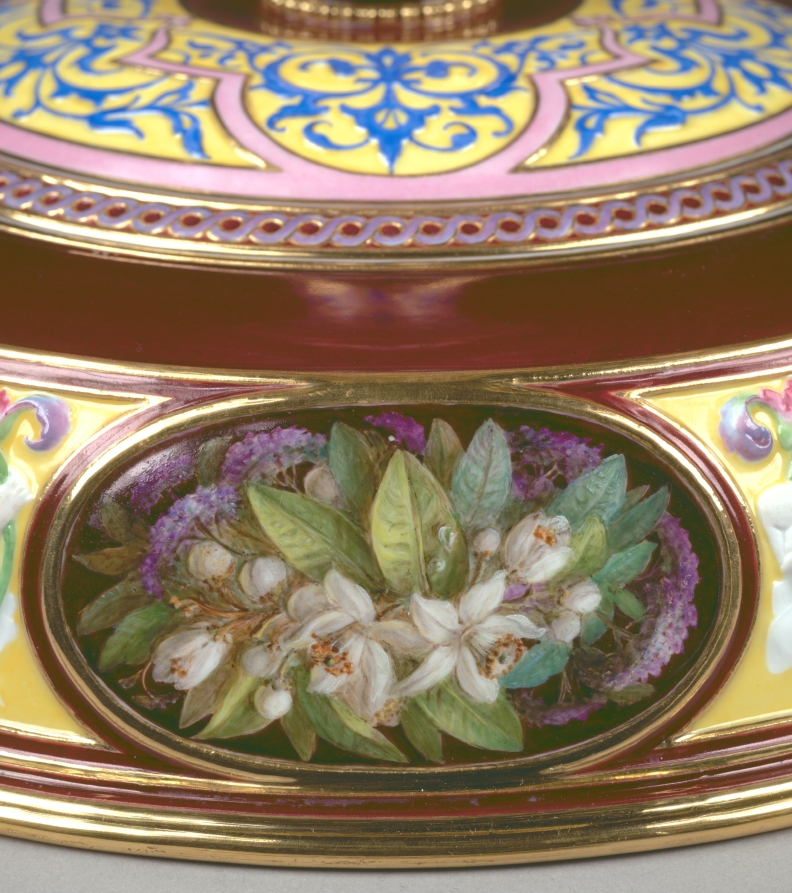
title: Standing Cup and Cover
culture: France, Sèvres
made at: Sèvres Porcelain Factory (French, est. 1756)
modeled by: Hyacinthe-Jean Regnier (French, 1803–1870)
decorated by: Francois-Hubert Barbin (French, 1786-)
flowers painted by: Jacques-Nicolas Sinsson (French)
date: 1844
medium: porcelain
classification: Ceramic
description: The official French porcelain factory at Sèvres has always been one of Europe's most important ceramic manufacturers, famous for its decorative pieces as well as more utilitarian wares. This vase in the Renaissance style, its design inspired by 16th-century French examples, is clearly in the tradition of elaborately conceived and decorated pieces intended for use by the French court or as presentation pieces by its monarchs. The latter was the fate of this Covered Cup, acquired in 1846 by Queen Marie-Amélie d'Orleans, the wife of Louis-Philippe, king during the July Monarchy (1830-48). Soon thereafter the vase was presented to a now unknown person. It is one of four pieces of this design made at the Sèvres factory, and the only one known today to have survived.